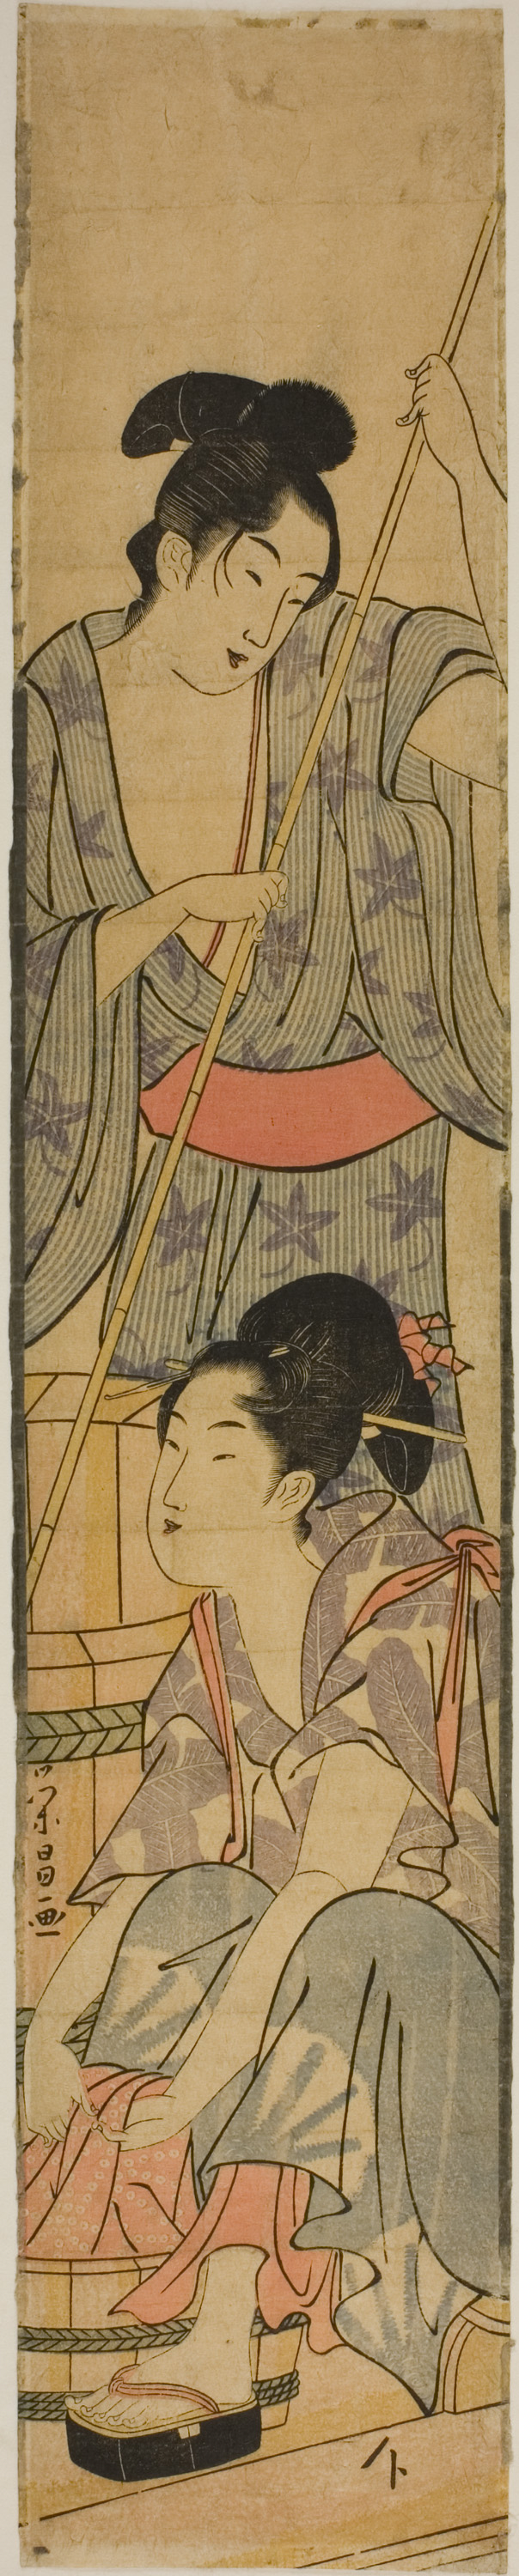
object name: Print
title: Washing Clothes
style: Japanese (culture or style)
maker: Chokosai Eisho (Japanese, active 1780-1800)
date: c. 1780/1800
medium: Color woodblock print; hashira-e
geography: Japan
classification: woodblock print; print; asian art